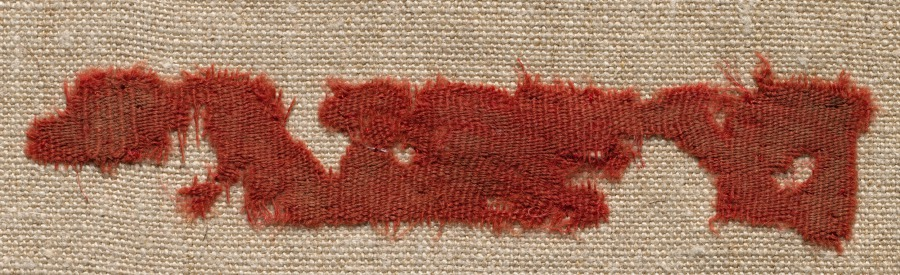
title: Wool Fragment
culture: Syria, Dura-Europos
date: 200s CE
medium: wool: tapestry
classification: Textile